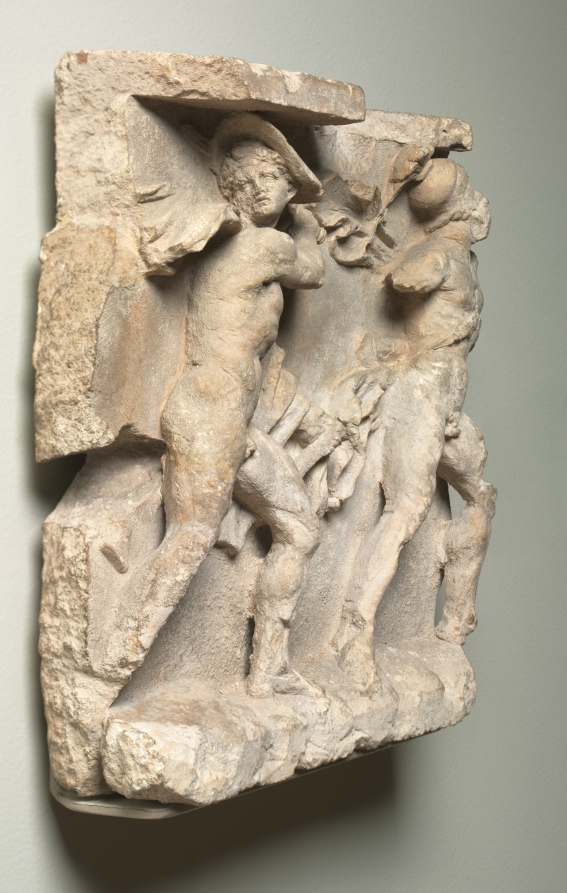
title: Relief of Striding Warriors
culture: Greek/South Italian, Taranto (ancient Taras)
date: 300–200 BCE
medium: limestone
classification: Sculpture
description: This carved limestone relief depicts two warriors striding to the right, one wearing a broad traveler's hat called a petasos and the other a Corinthian helmet. Each wears a short cloak called a chlamys over his left arm (now missing on the righthand warrior). The left warrior looks back, perhaps toward a horseman, since a small fragment of a horse’s foreleg remains behind his knee. The strong diagonals of the warriors contrasted with the flowing drapery of their cloaks demonstrates a dynamism characteristic of Hellenistic relief sculpture.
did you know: This relief was likely part of a larger frieze that decorated a naiskos, or small temple, above a grave.